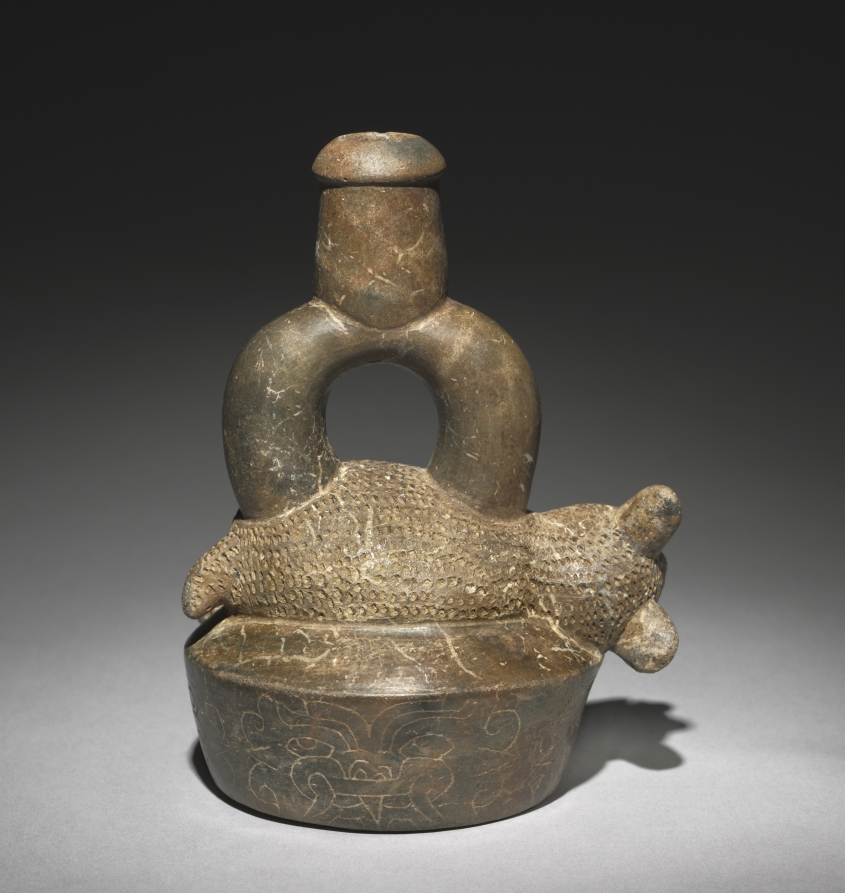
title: Vessel with Pudu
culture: Central Andes, North Coast, Chongoyape, Formative period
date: 500–200 BCE (thermoluminescence date, 1190–90 BCE)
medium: ceramic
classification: Ceramic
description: This bound pudu—a small reddish deer indigenous to the Andes—lies atop a chamber with fanged supernatural heads incised on the sides. The animal may represent a sacrificial offering.